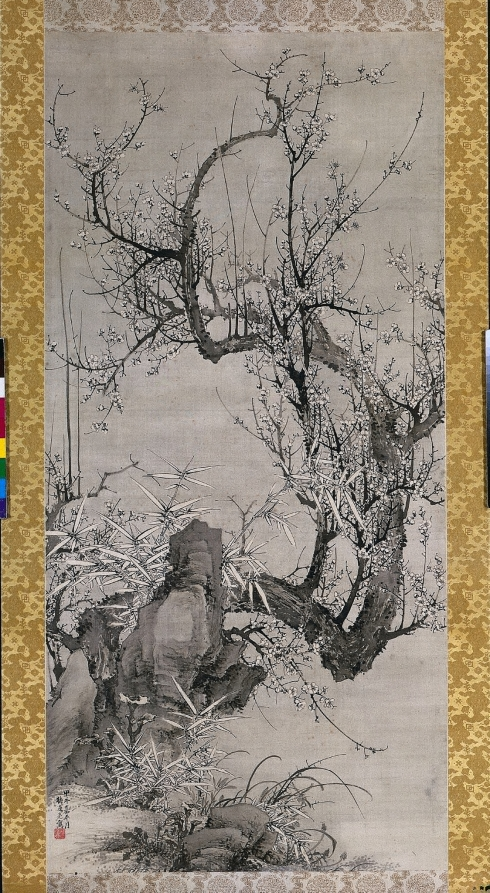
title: Plums, Bamboo, and Orchid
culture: Japan, Edo period (1615–1868)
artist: Yamamoto Baiitsu (Japanese, 1783–1856)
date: 1834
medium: hanging scroll; ink on silk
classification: Painting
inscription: date and signature at lower left.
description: This painting represents three of the plants known as the Four Gentlemen of Chinese painting; it lacks only autumn’s chrysanthemum. The plants’ characteristics are symbols of Confucian virtues, such as open-mindedness (bamboo), strength in the face of adversity (plum), and humility (orchid).